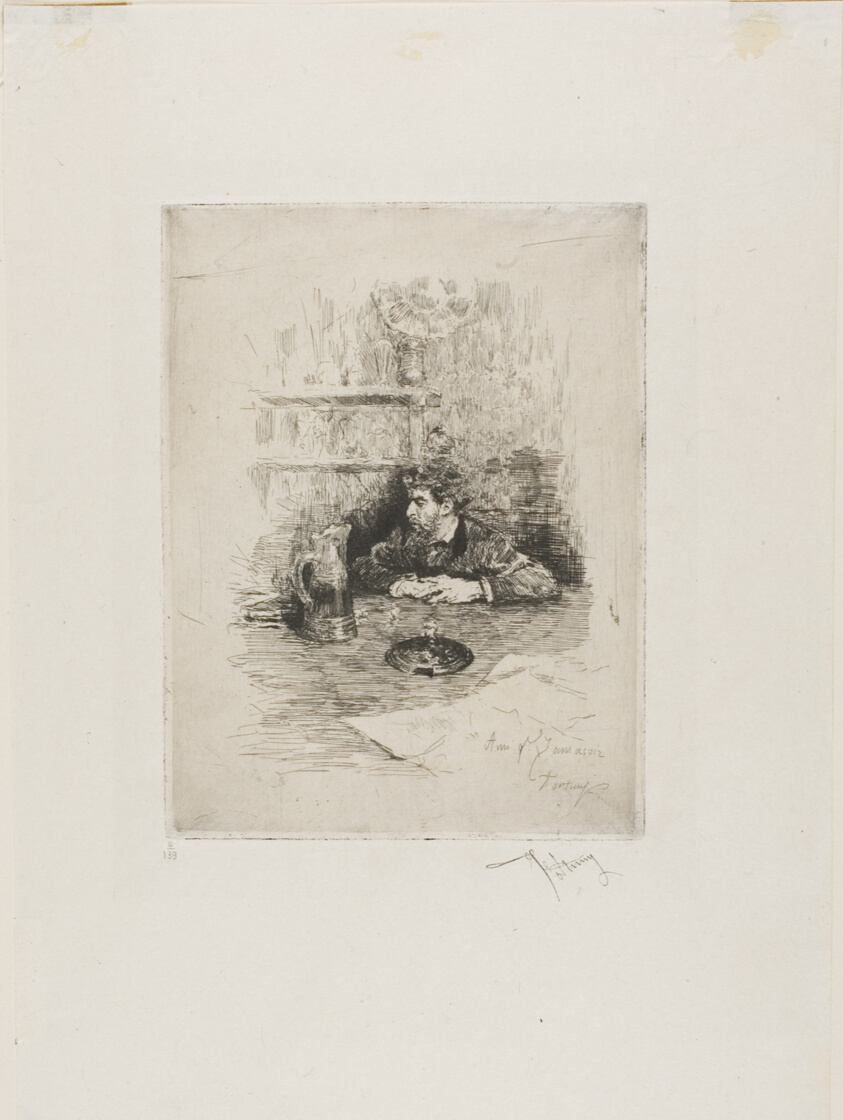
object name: Print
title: Portrait of Eduardo Zamaçois, Spanish Painter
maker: Mariano José María Bernardo Fortuny y Carbó; Spanish, 1838-1874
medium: Etching on paper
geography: Spain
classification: etching; print; prints and drawing